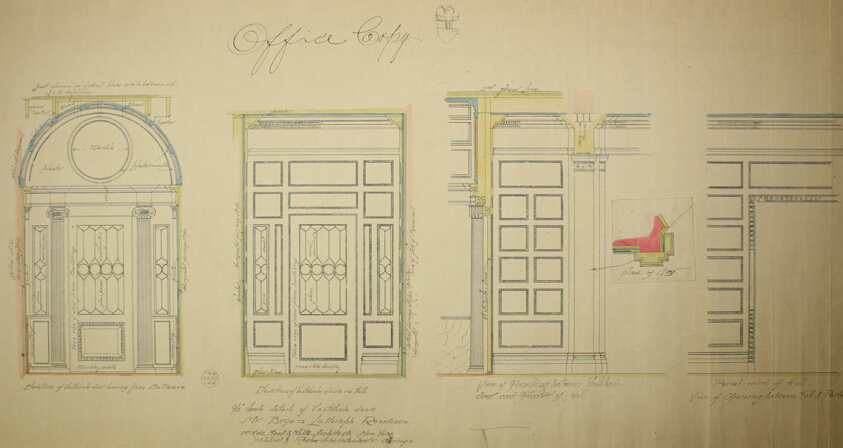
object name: Architectural Drawing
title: Vestibule Doors, Bryan Lathrop House, Chicago, Illinois, Shop Drawing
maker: McKim, Mead and White; American, 1879-1919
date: 1892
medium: Graphite on linen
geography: Chicago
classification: working drawing; architectural drawing